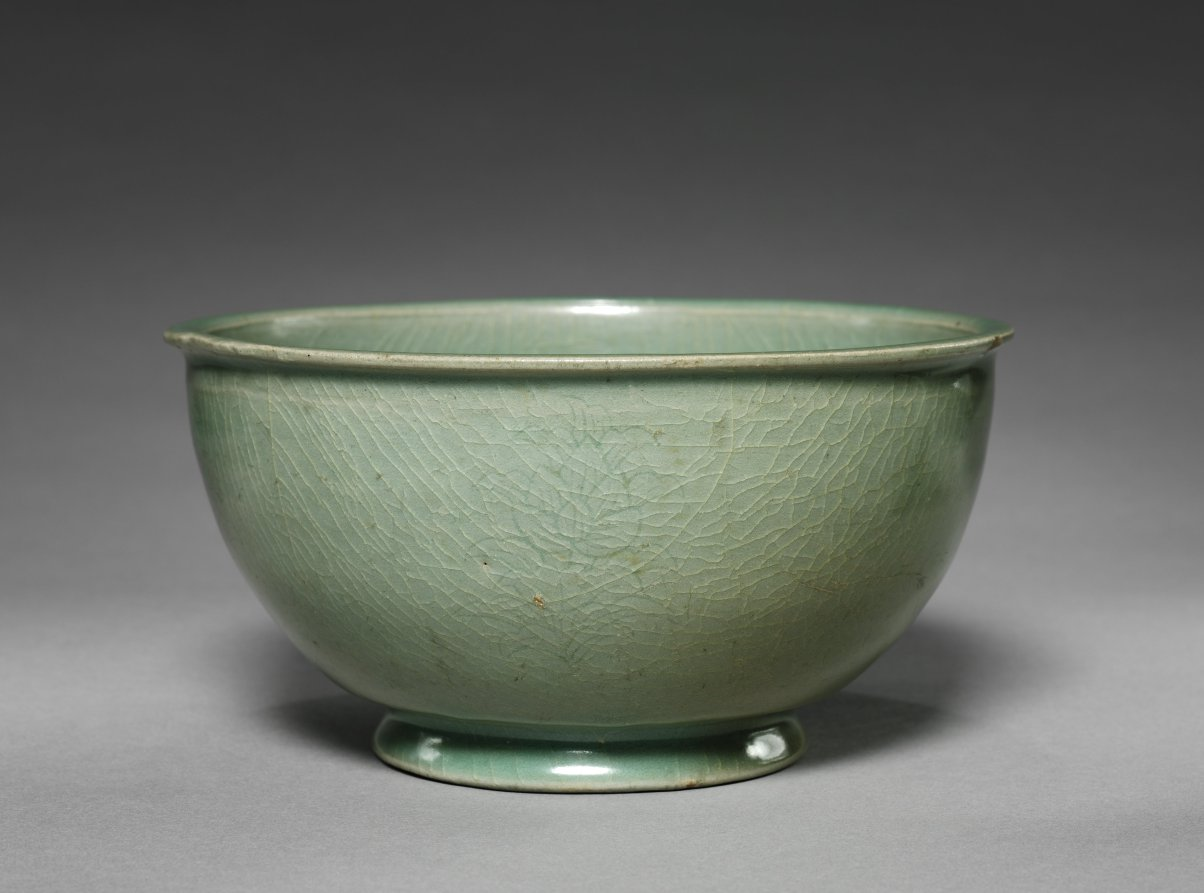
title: Bowl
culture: Korea, Goryeo dynasty (918–1392)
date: 1100s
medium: pottery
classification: Ceramic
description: As early as the seventh century, the practice of drinking tea and wine became an important part of elite culture in Korea. Elites of the Goryeo period commissioned a variety of types of utensils and vessels including this large bowl paired with a shallow saucer, to make their drinking experience more exciting.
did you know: The crackle pattern that appears all over this bowl was caused by a thermal expansion mismatch between the body and the glaze.